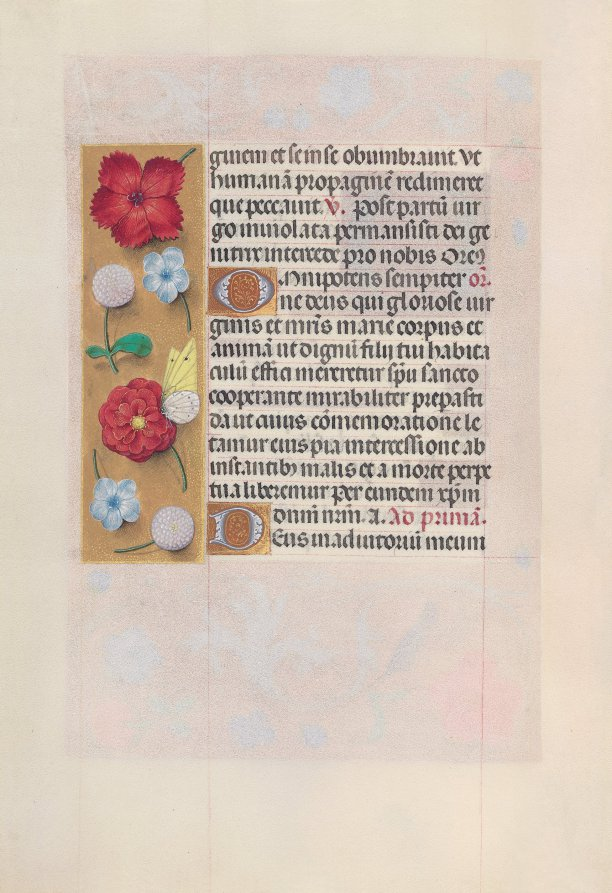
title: Hours of Queen Isabella the Catholic, Queen of Spain: Fol. 81v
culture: Flanders, Ghent and Bruges, late 15th century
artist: Master of the First Prayerbook of Maximillian (Flemish, c. 1444–1519)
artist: and Associates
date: c. 1500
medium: ink, tempera, and gold on vellum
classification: Bound Volume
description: This manuscript was illuminated by a circle of at least five highly organized manuscript painters active in the Flemish cities of Ghent and Bruges. The principal illuminator was Alexander Bening, who painted the majority of the book's miniatures. Manuscripts produced by this circle of artists are renowned for the decoration of their borders, which typically feature a rich variety of realistically-painted flowers, birds, and butterflies. This prayer book, called a book of hours, was intended not for a cleric, but for the private devotions of a lay person-in this case, Isabella the Catholic, Queen of Spain (1451-1504). Isabella's coat of arms embellishes the book's frontispiece. It is unlikely that the book was commissioned by the Queen herself; rather, she probably received it as a diplomatic gift from someone courting her patronage, perhaps Cardinal Francisco Jimenez de Cisneros. A Franciscan friar, Jimenez was dependent upon Isabella for his advancement, first to the post of Queen's confessor in 1492, and then to Archbishop of Toledo in 1495.